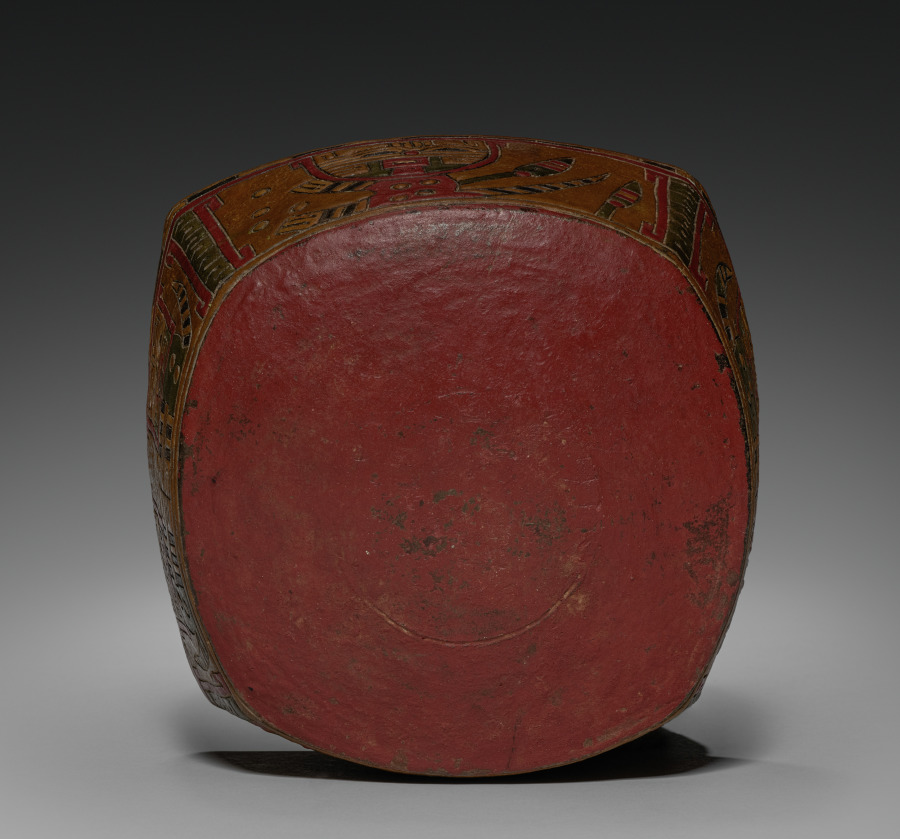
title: Square Bowl with Pampas Cats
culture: Central Andes, South Coast, Paracas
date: 500–400 BCE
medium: Ceramic, post-fire paint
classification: Ceramic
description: The Paracas often decorated their ceramics with geometricized representations of the native Pampas cat, a small, reclusive, wild feline that lives on the margins of agricultural fields, where it preys on the rodents and other pests that are a farmer’s bane. Thus, the ancients seem to have linked it to nature’s fertility and, by extension, human prosperity and continuity.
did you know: The animal shown on this bowl is the Pampas cat, a small, wild feline.